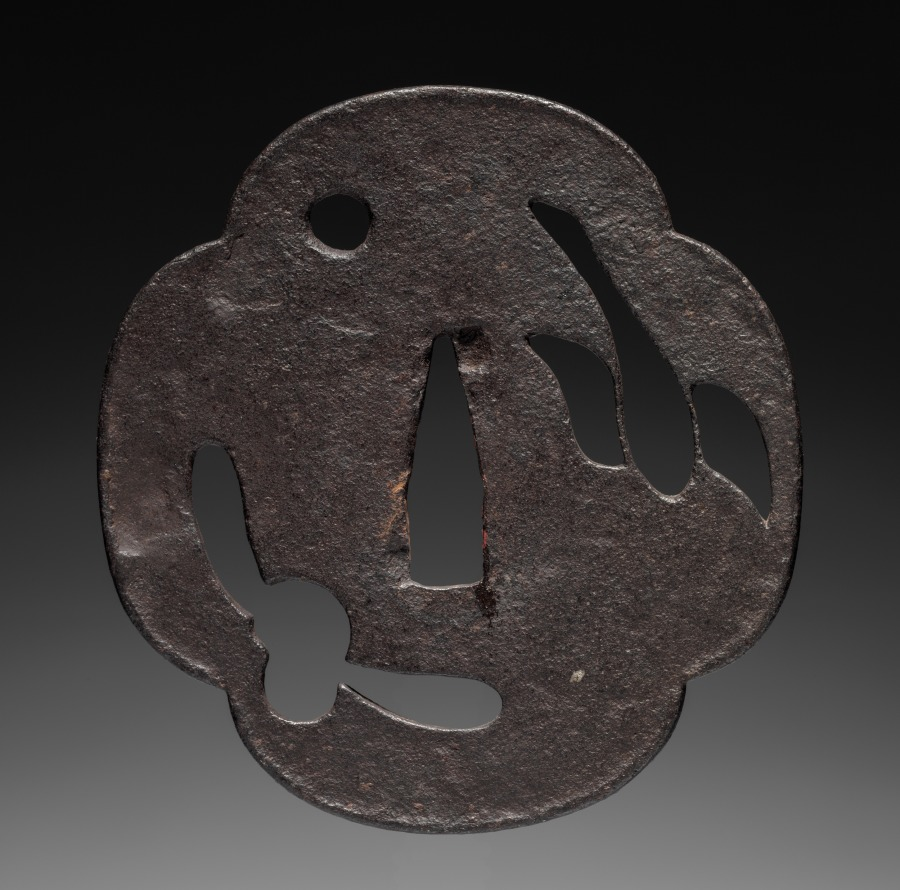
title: Sword Guard (Tsuba) with Geese and Moon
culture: Japan, possibly Edo period (1615-1868)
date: c. 1615–1868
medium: iron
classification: Arms and Armor